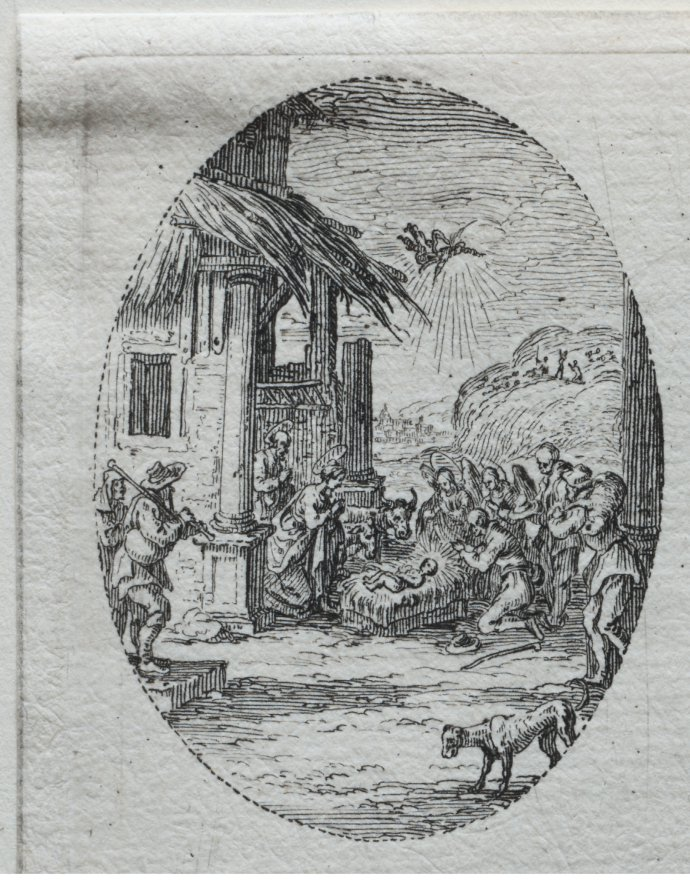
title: The Mysteries of the Passion: The Adoration of the Shepherds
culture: France, 17th century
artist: Jacques Callot (French, 1592–1635)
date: 1631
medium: etching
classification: Print